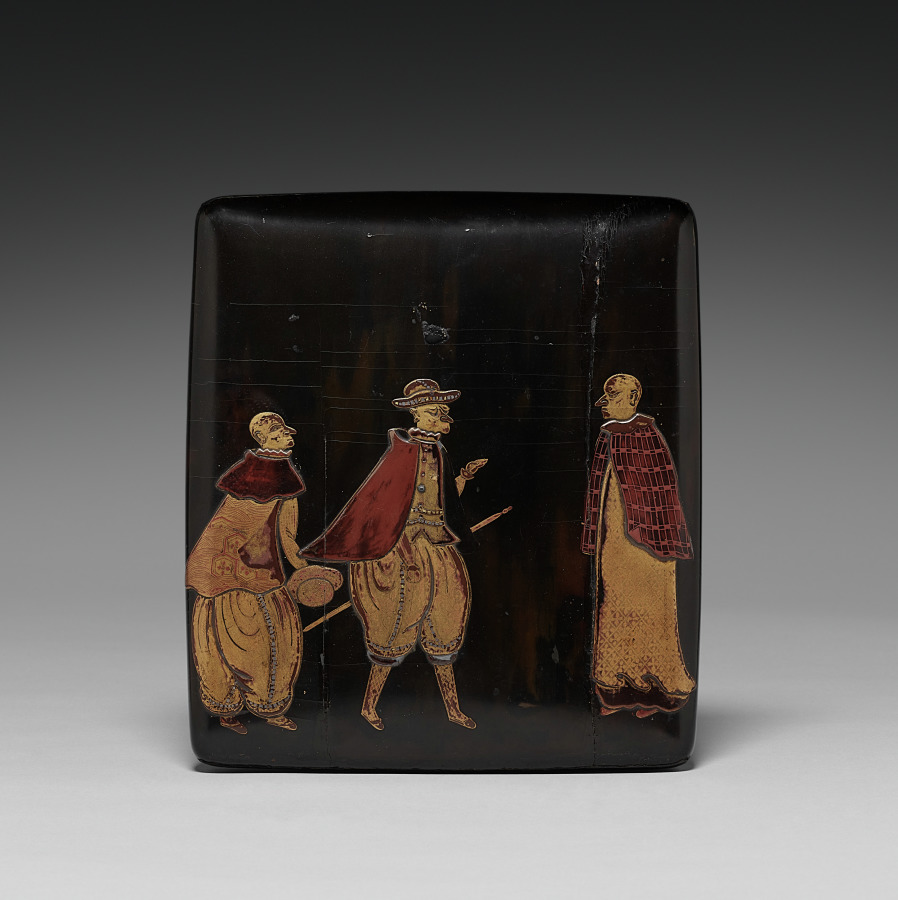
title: Writing Box (Suzuribako) with Europeans (lid)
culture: Japan, Edo period (1615–1868)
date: 1800s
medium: lacquered wood with gold maki-e, silver inlay and red lacquer on black ground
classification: Lacquer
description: For many Japanese patrons, objects decorated with images of foreigners offered the rare opportunity to see westerners. The two men on the left were likely Portuguese traders, identifiable by their balloon-shaped pants. The man on the right is a Jesuit priest. Portuguese traders arrived in Japan in 1543 and soon after Christian missionaries began to create outposts there. By the early 17th century, Christianity was outlawed and the Portuguese were forced out of Japan. This object was created during the short period when the Portuguese were allowed in Japan.